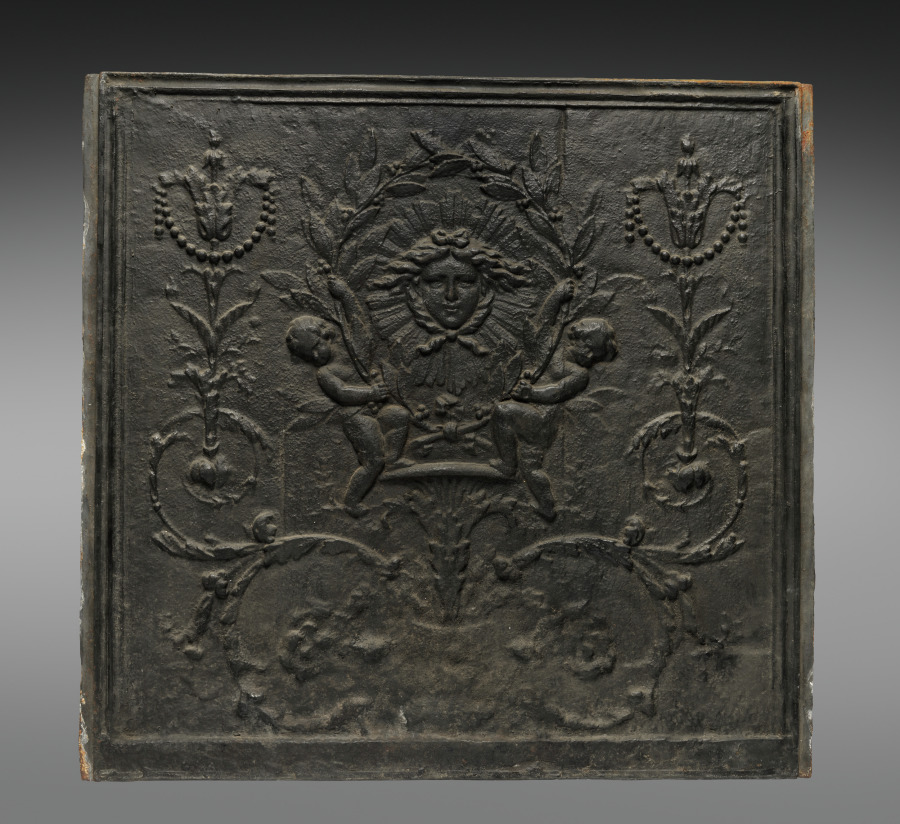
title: Set of Fire Linings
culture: France, style of Louis XVI, 18th Century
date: c. 1770–1780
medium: cast iron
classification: Furniture and woodwork